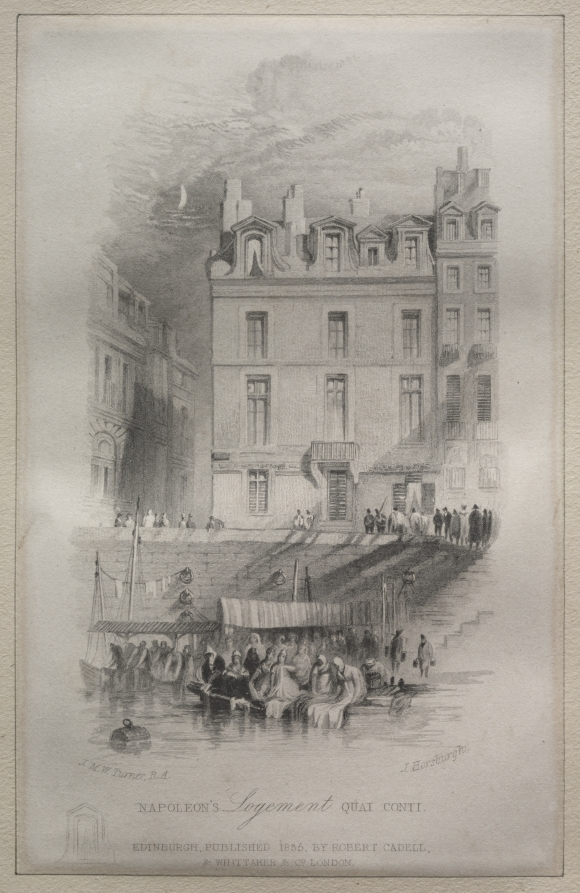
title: Napoleon's Logement, Quai Conti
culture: England, 19th century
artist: John Horsburgh (British, 1791–1869)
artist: after Joseph Mallord William Turner (British, 1775–1851)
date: 1835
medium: engraving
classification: Print